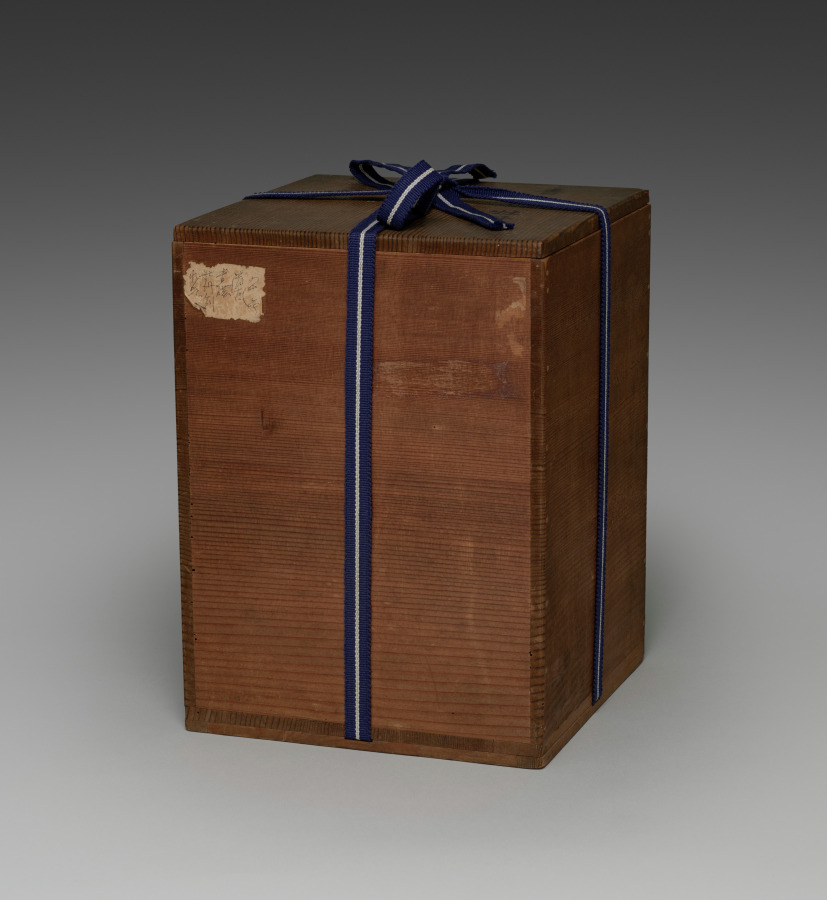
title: Water Container with Peonies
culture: Japan, Meiji period (1868–1912)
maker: Seifū Yohei III (Japanese, 1851–1914)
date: 1900–1914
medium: Porcelain with molded and carved design, green glaze, and black lacquered lid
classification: Ceramic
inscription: 清風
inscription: 帝室技芸員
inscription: 清風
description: This ceramic is an especially accomplished example of Yohei III’s combination of an allover translucent colored glaze with molded and carved designs. It features the peony as its primary motif. The water container, or mizusashi, has a green glaze, and its design takes into consideration the rounded shape and the seated position of the host and guests. It begins low on the body with a flower just beginning to open and continues with another flower a bit higher up, with its petals fully extended and beginning to open outward. It finishes with a flower in full bloom, petals and leaves unfurled and spread outward from the center, now occupying almost the entire surface. The water container once belonged to the Hosokawa family, whose go-between corresponded with Yohei IV about the piece. Yohei IV thanked them for their payment and requested that despite his father’s death in the previous year, they continue to favor the studio with their orders. The letter and its envelope, as well as an auction tag, remain with the object.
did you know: This water container may also serve as a site for cultural reckoning, as when the life cycle of a flower prized in East Asia as a symbol of wealth is displayed across a Japanese chanoyu vessel whose glaze is associated with the seats of power in China and Korea.